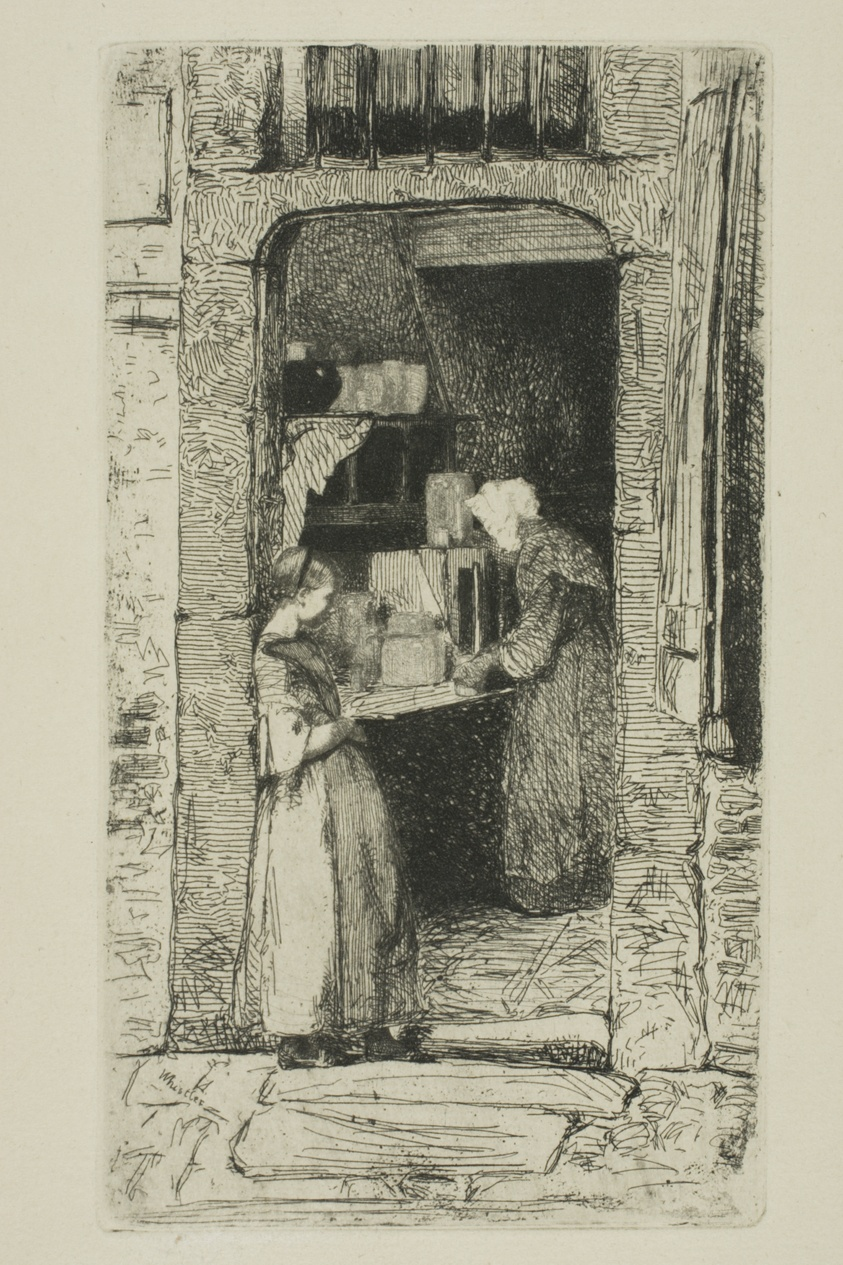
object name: Print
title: La Marchande de Moutarde (The Mustard Seller)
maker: James McNeill Whistler (American, 1834-1903)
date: 1858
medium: Etching with foul biting in black ink on cream laid paper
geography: United States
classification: etching; foul biting; print; prints and drawing; paper